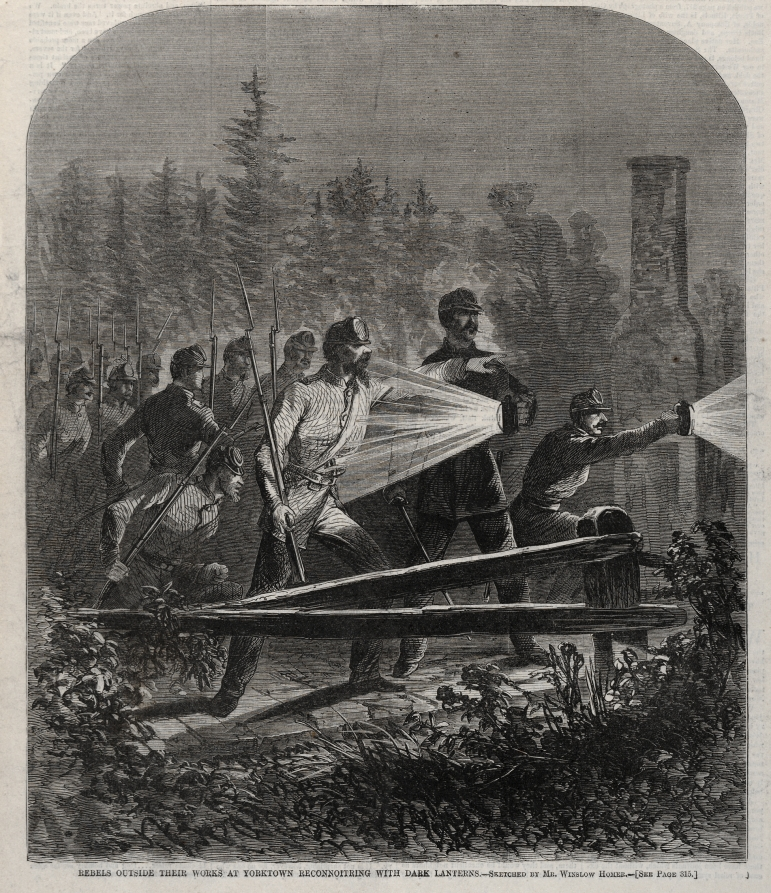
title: Rebels Outside Their Works at Yorktown Reconnoitering with Dark Lanterns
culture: America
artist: Winslow Homer (American, 1836–1910)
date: 1862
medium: wood engraving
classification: Print